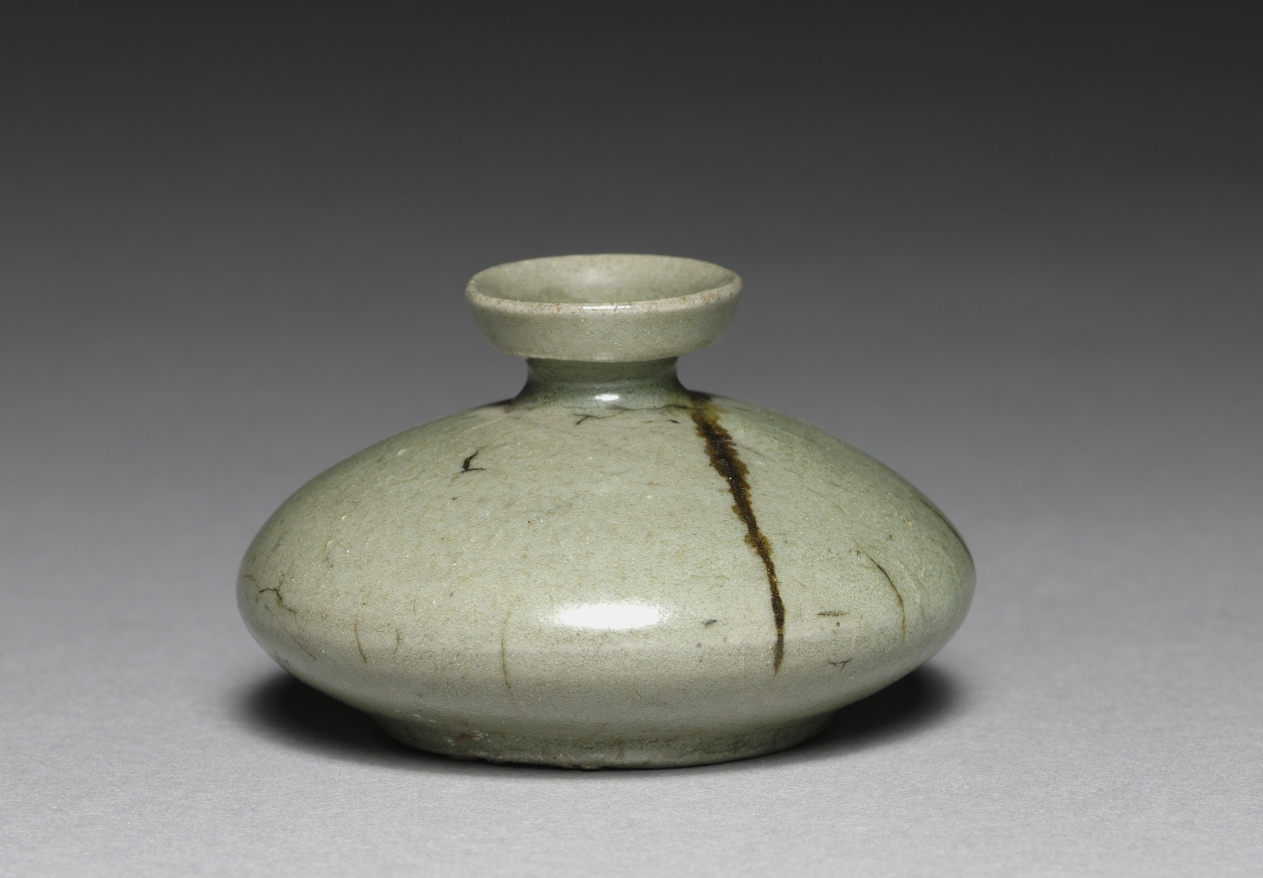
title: Oil Bottle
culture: Korea, Goryeo dynasty (918–1392)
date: 1100s–1200s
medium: celadon ware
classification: Ceramic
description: Celadons, spoons, seals, and bronze mirrors were the most common burial objects in tombs during the Goryeo period (918–1392). Once used to contain oil treatment for hair, this little celadon bottle was one of the standard goods that furnished elites' tombs.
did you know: This bottle was used to contain oil treatment for hair.